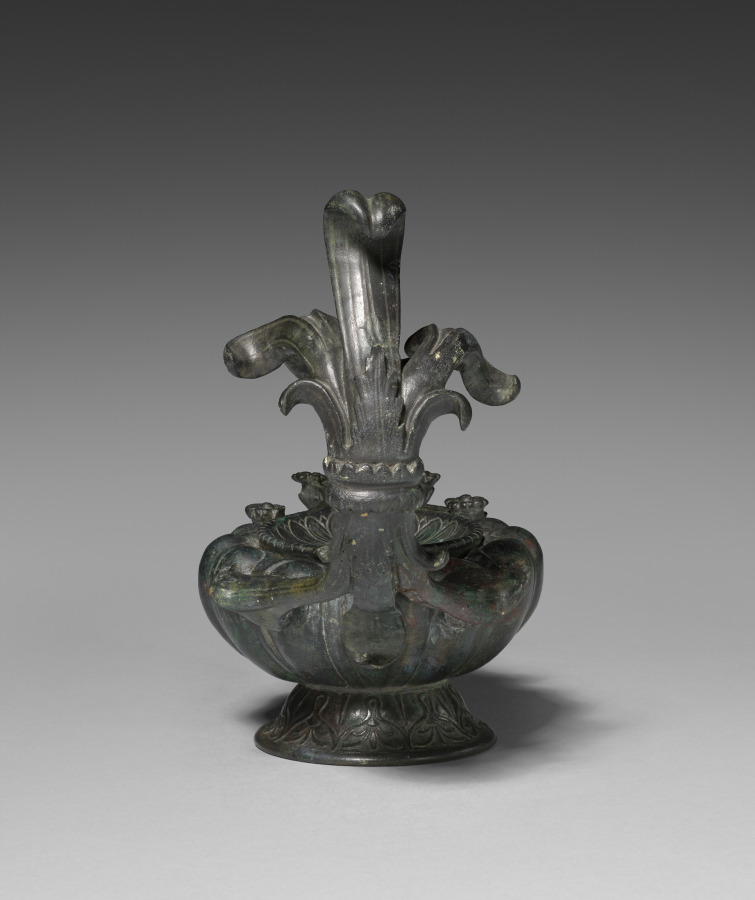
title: Oil Lamp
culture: Roman, late Republican-early Imperial (c. 50 BCE – 50 CE)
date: c. 50 BCE–50 CE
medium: Bronze, cast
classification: Metalwork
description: This large and ornate cast bronze oil lamp features a central hole for filling and a single spout for its wick. Its extravagant handle rises to create both a loop and a sort of hook, one or both of which may have served to suspend the lamp when lit. Alternatively, the lamp may have stood on its own, perhaps atop a tall lampstand. While its primary function may have been for lighting dark spaces, this lamp must also have served an ornamental purpose.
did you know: When used, this lamp likely hung from the ceiling or stood on a tall lampstand.